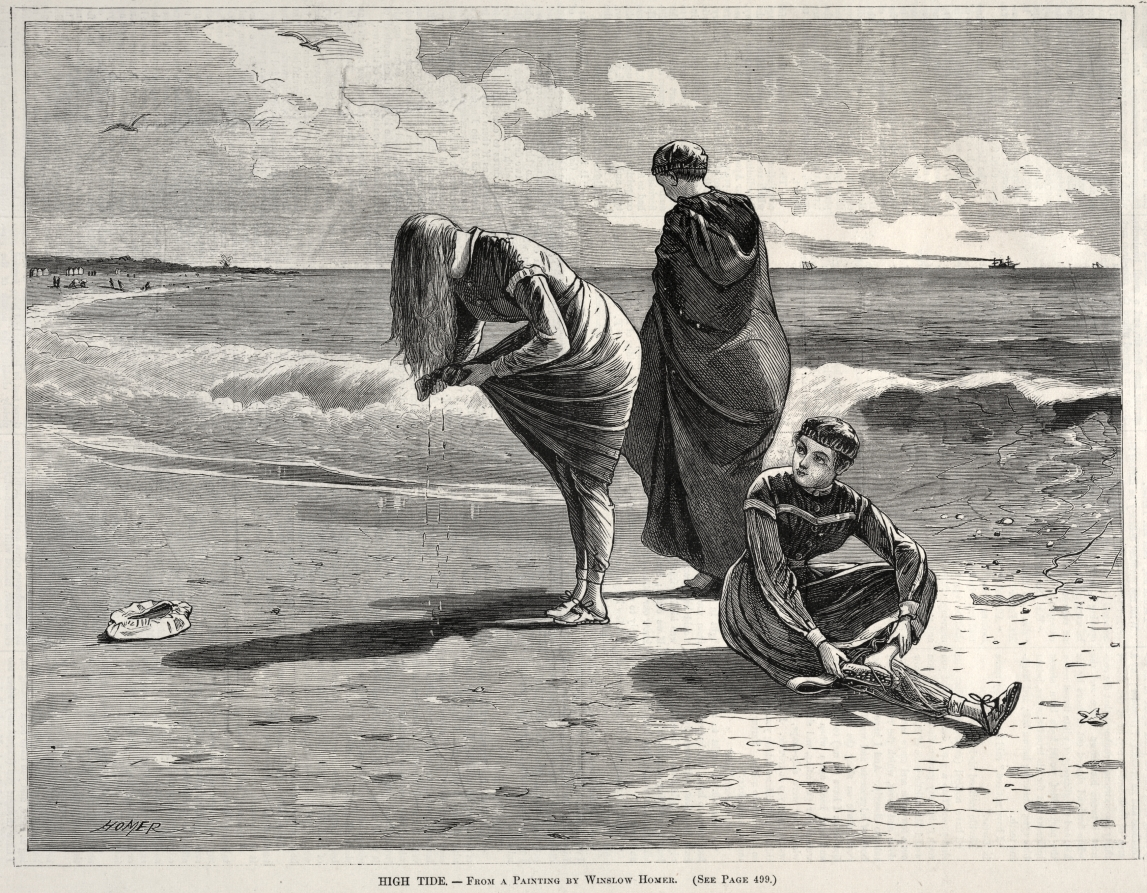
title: High Tide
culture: America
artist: Winslow Homer (American, 1836–1910)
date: 1870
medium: wood engraving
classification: Print